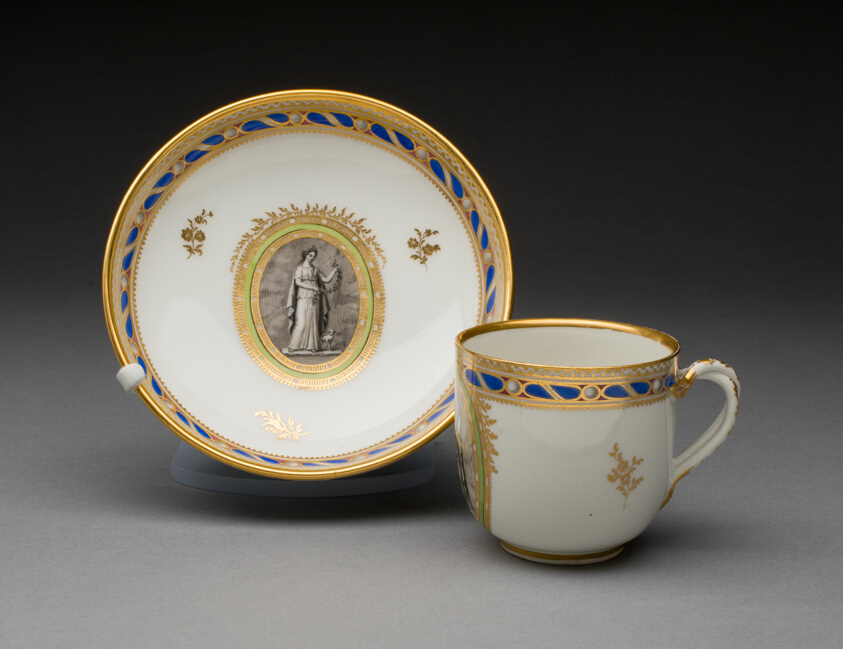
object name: Ceramics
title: Cup and Saucer (part of a Coffee Service)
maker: Vienna State Porcelain Manufactory (Austrian, 1744-1864)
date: c. 1770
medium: Hard-paste porcelain, monochrome black (Schwartzlot), polychrome enamels, and gilding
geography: Vienna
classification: drinking vessel; teaware; porcelain; european decorative arts; ceramics